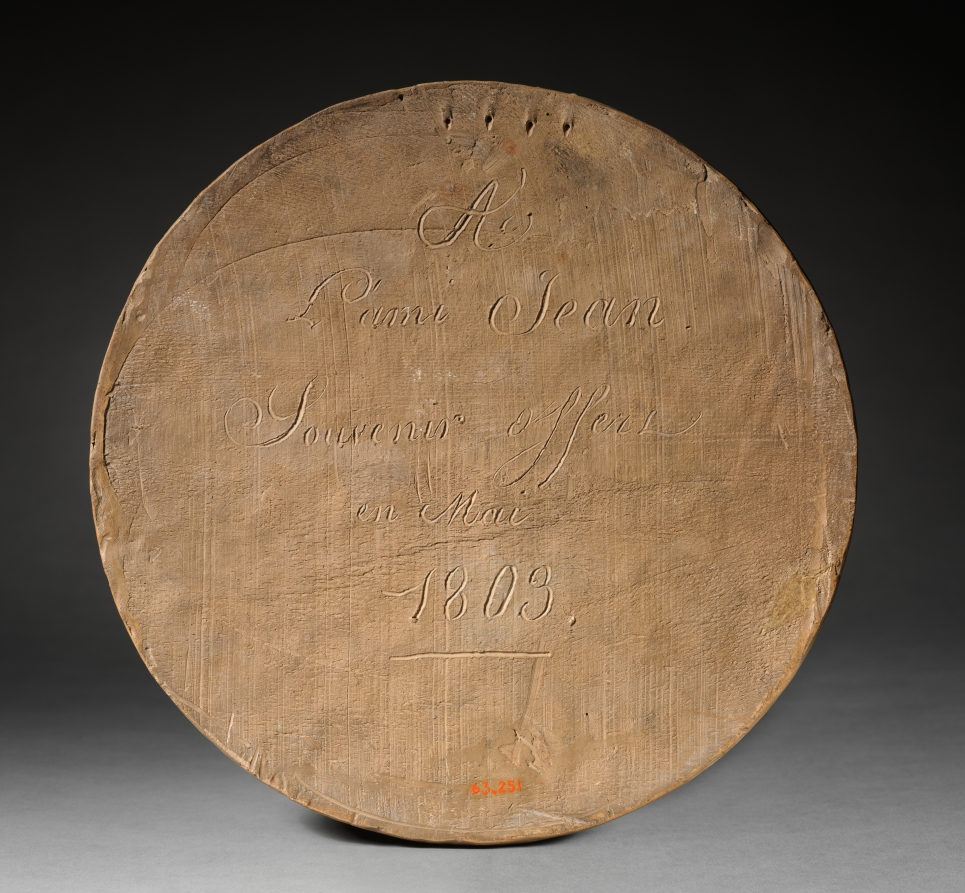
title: Satyress and Child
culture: France, early 19th Century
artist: Clodion (French, 1738–1814)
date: 1803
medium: terracotta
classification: Sculpture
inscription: inscribed recto lower right: CLODION; inscribed verso: A/L'ami Jean/Souvenir offert/ en mai/ 1803.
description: Born in Nancy to a family of artists, Clodion was one of the leading French sculptors of the ancien régime and Napoleonic era. He went to Paris to study sculpture in 1755 and worked in Rome from 1767 to 1771. Although inspired by the art of classical antiquity, as seen in the mythological subject of this terracotta relief, Clodion continued to model forms with a softness and delicacy reflective of his training during the Rococo period.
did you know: An invention of European artists of the post-Roman period, a satyress is the female equivalent of the male satyr in classical antiquity. Part human and part goat or horse, the satyress can be recognized by her animal legs and hoofs.